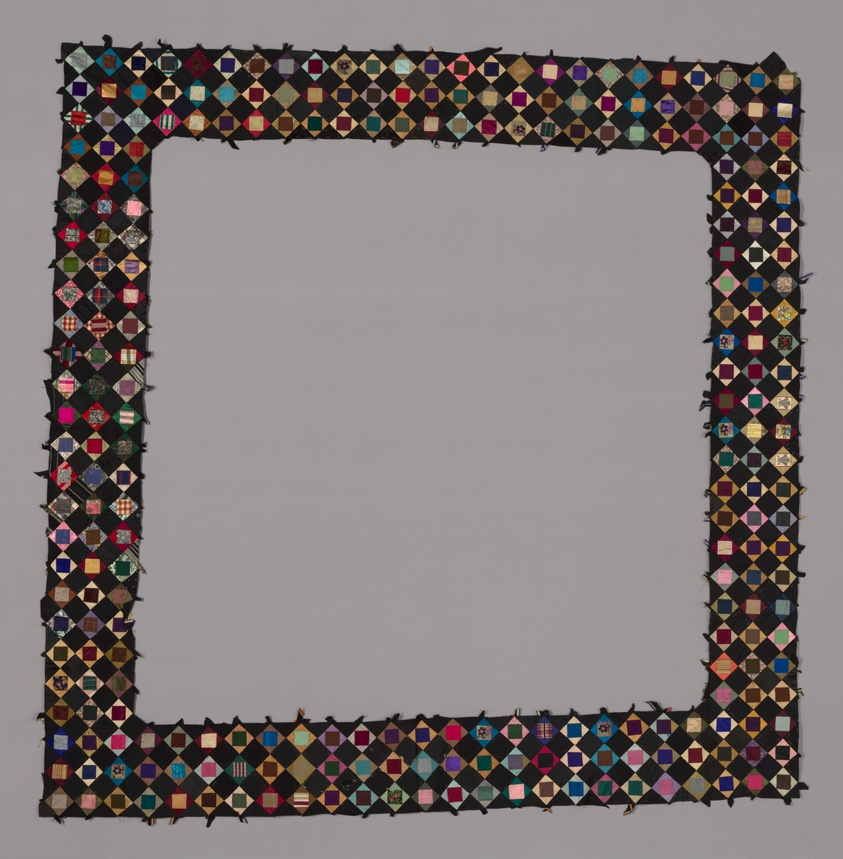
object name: Textile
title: Fragment (From a Bedcover)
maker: United States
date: 1876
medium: Silk, plain, twill, and satin weaves; some with supplementary patterning and brocading wefts, some with self-patterning; some printed; some warp painted (chiné); pieced over paper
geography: United States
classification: textile; needlework - quilt